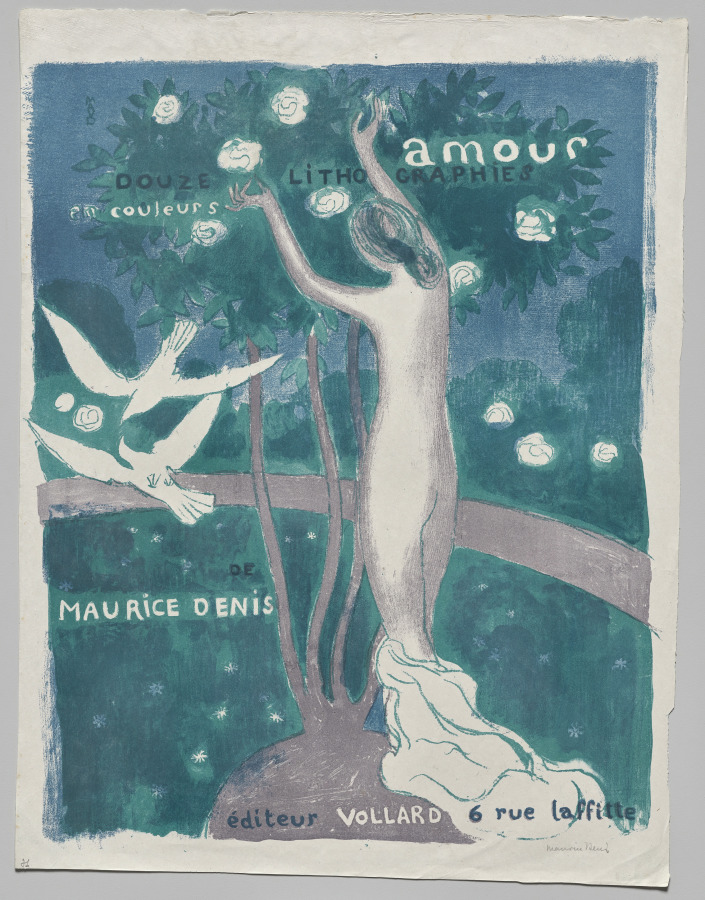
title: Title Page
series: Love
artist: Maurice Denis (French, 1870–1943)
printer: August Clot (French, 1858–1936)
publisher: Ambroise Vollard (French, 1867–1939)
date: 1899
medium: color lithograph on China paper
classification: Print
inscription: In graphite, recto, lower left: [illegible number]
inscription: In graphite, recto, lower right: Maurice Denis (signed)”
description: Maurice Denis belonged to the Nabis, a group of artists who came together in 1889 to pursue a radical new style informed by subjective experience and emotion. This print is from a series in which Denis explored his devotion to his wife, Marthe, by depicting her in a variety of settings alongside titles drawn from his own journal. The vague but evocative images were meant to encourage the viewer to draw connections to the theme and meditate on its meaning.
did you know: Maurice Denis was a devout Catholic and often drew visual connections between his wife, Marthe, the subject of this print series, and the Virgin Mary.